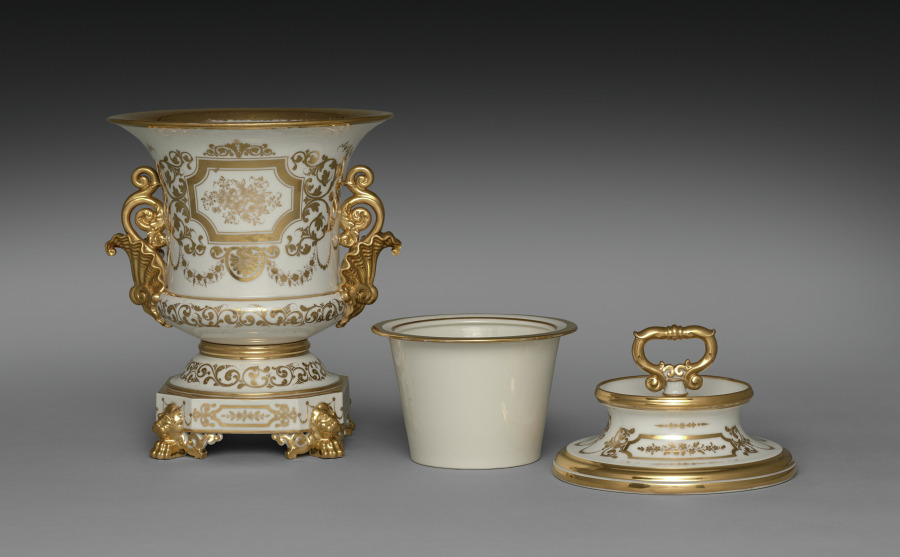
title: Covered Ice Cream Pail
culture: France, Paris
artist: Factory of Jacob-Petit (French, 1830–1865)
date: c. 1840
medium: gilt porcelain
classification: Ceramic